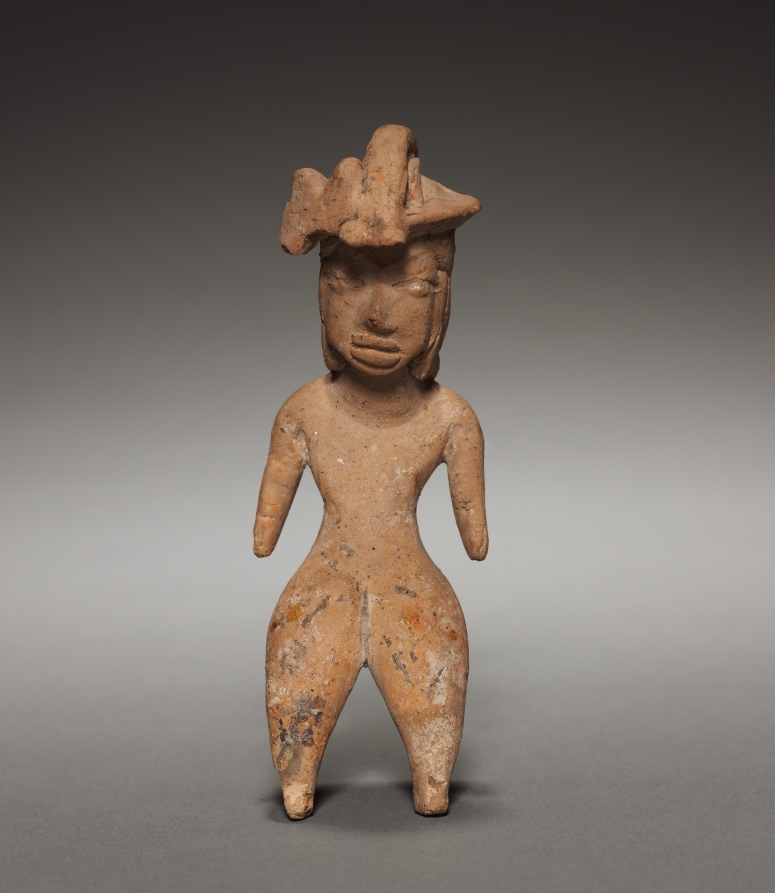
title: Female Figurine with Headdress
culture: Mesoamerica, Central Mexico, Tlatilco, type D1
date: 1200–900 BCE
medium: pottery with traces of white and red pigment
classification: Sculpture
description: This ceramic figurine—in the style of Tlatilco, an early village site in central Mexico—depicts a female with a headdress or hat and long hair that cascades down her back. Since many figurines from the period depict females, modern interpreters usually connect them to fertility concerns. They also seem to testify to the importance of women among early Mesoamerican cultures.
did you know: The figure’s broad thighs may express beauty, or perhaps indicate a life stage.